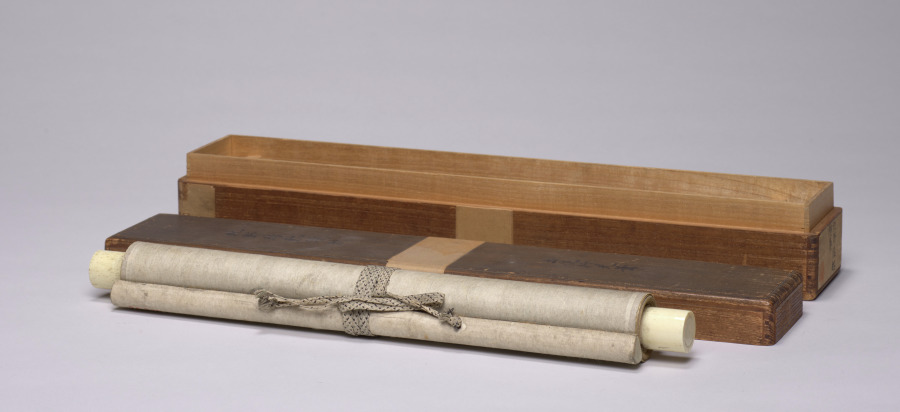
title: Stork, Sun, and Pine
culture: Japan, Edo period (1615–1868)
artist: Utagawa Hiroshige II (Japanese, 1826–1869)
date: c. 1839–1864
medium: color woodblock print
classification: Print